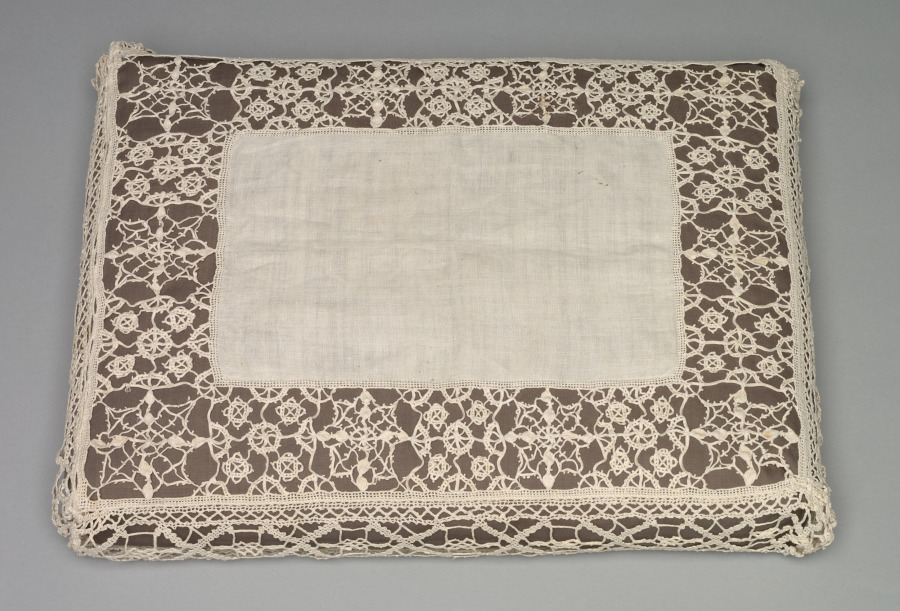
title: Lace Pillow Cover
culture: Italy, Venice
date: 1600s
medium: Plain weave linen (center): plaited bobbin lace edging that mimics needle lace (reticella)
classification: Lace